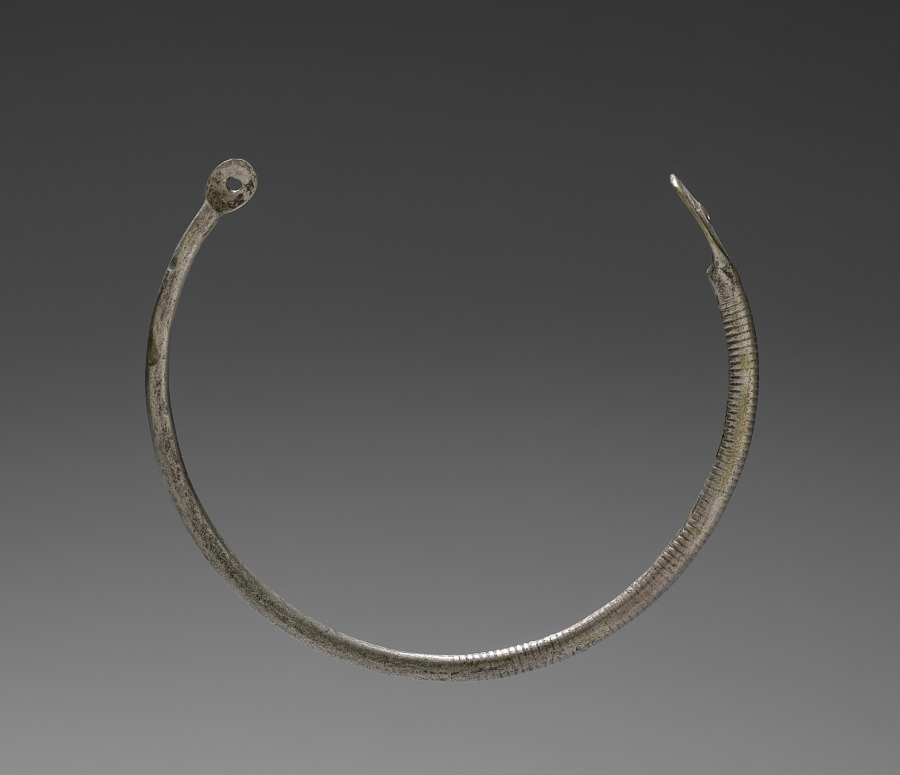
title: Nose Ring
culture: Indo-Chinese, made in France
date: 20th Century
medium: silver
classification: Jewelry